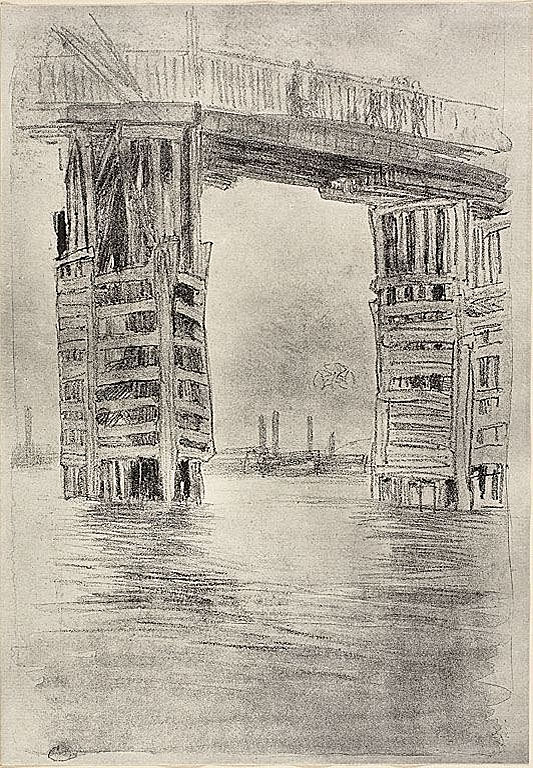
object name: Print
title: The Tall Bridge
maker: James McNeill Whistler (American, 1834-1903)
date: 1878–1913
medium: Photo-lithographic reproduction in black ink on ivory laid paper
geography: United States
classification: unidentified; lithograph; print (reproduction); prints and drawing; print; paper